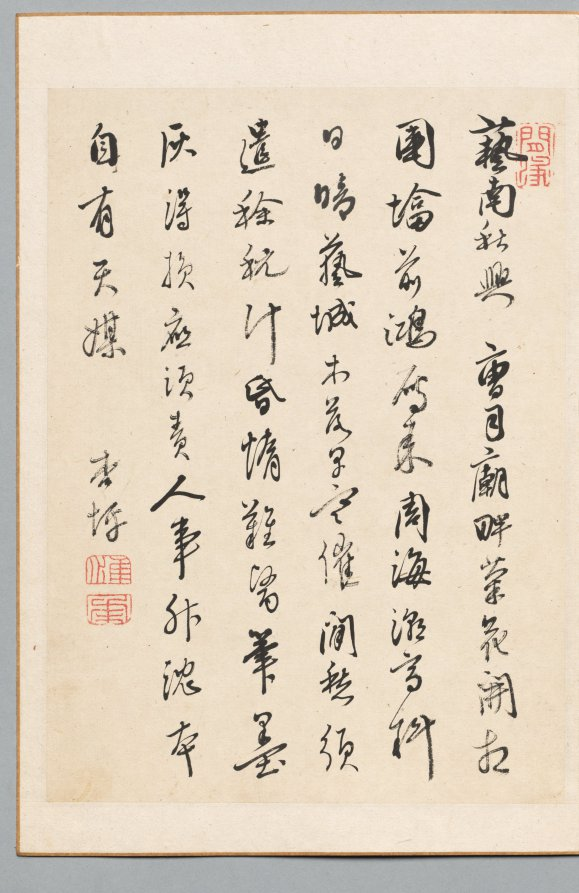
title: Poem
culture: Japan, Edo period (1615–1868)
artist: Rai Kyōhei (Japanese, 1756–1834)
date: late 1700s-early 1800s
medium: leaf from a pair of albums; ink on paper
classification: Portfolio